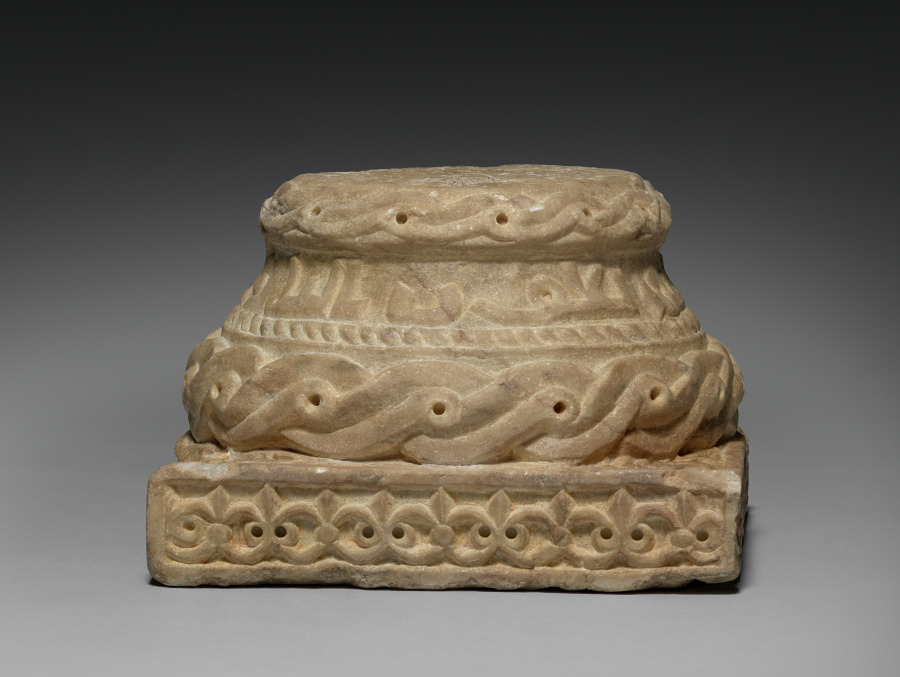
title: Column Base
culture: Spain, Cordoba, Spanish Umayyad period (756–1031)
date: c. 960–76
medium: Marble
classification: Sculpture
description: This base comes from the palatial city of Madinat al-Zahra near Cordoba (Spain) which was begun by caliph Abd al-Rahman III (r. 912–61) around 936. Large parts of the Iberian Peninsula were then under Islamic rule and experienced a cultural flowering. The city, destroyed already in 1010, was the most magnificent palace complex in Europe at the time.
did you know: In the mid-1800s the ruins of Madinat al-Zahra were rediscovered and the source of great fascination as people imagined a palace like that in the stories of 1001 Nights.